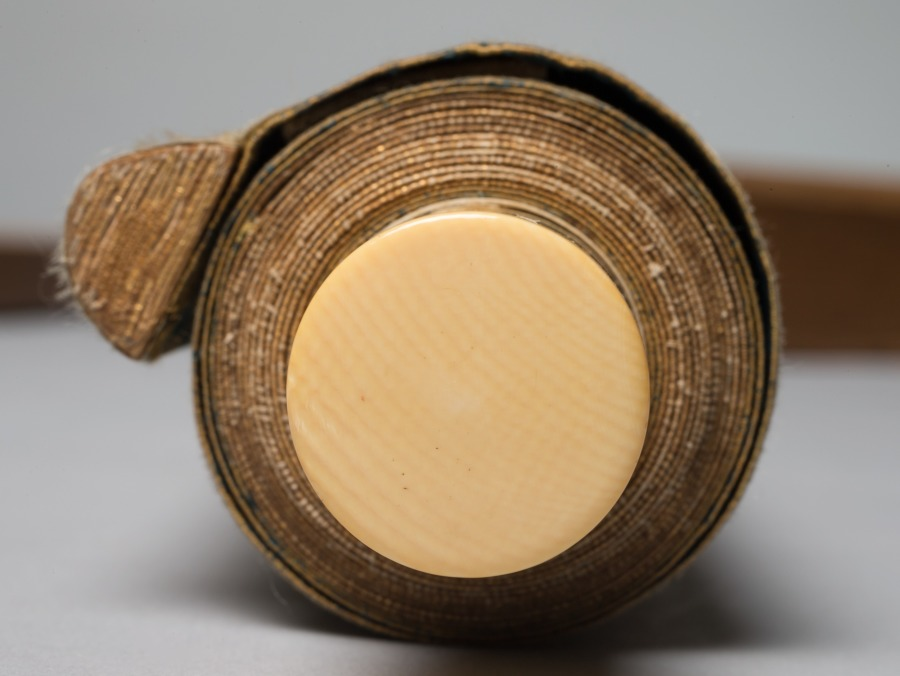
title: Sparrows on Blossoming Plum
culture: Japan, Edo period (1615–1868)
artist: attributed to Kano Tan’yū (Japanese, 1602–1674)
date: 1661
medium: One of a triptych of hanging scrolls; ink and slight color on silk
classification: Painting